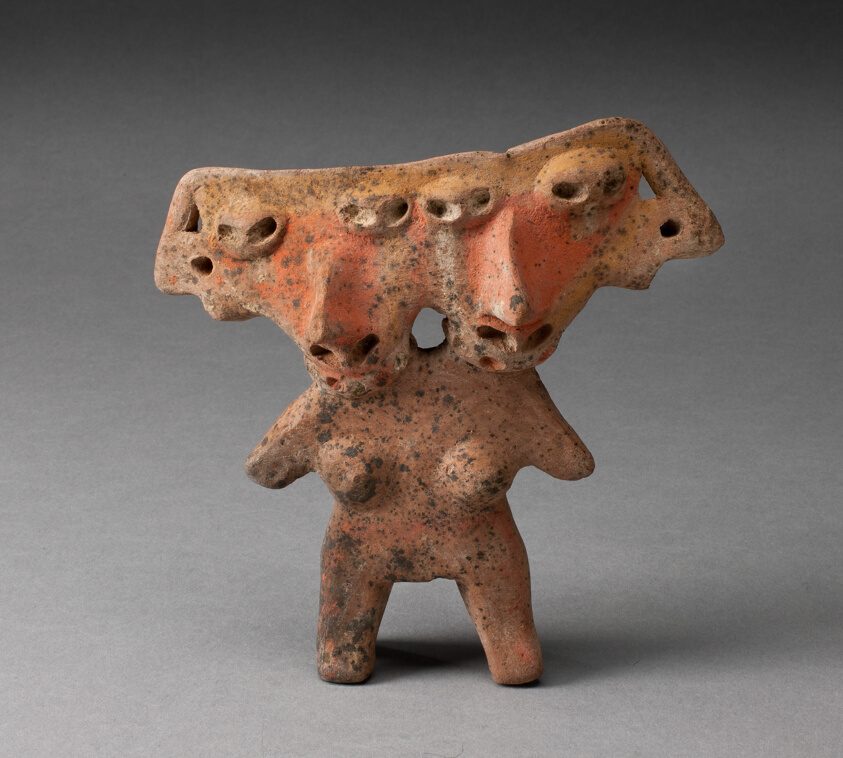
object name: Sculpture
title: Female Figure with Two Joined Heads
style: michoacan, Arts of the Americas, mesoamerican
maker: Michoacan (Michoacan, Mexico)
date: 200 BCE–300 CE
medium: Ceramic and pigment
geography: Michoacán state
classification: earthenware; art of the americas; ceramics; sculpture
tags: people